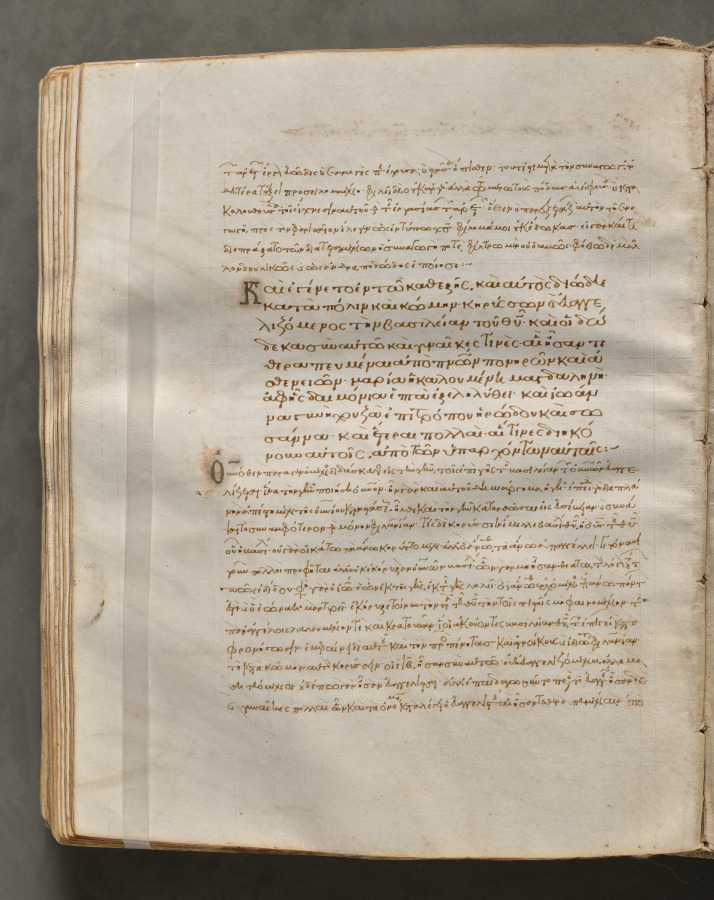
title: Text, folio 237 (verso), from a Gospel Book with Commentaries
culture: Byzantium, Constantinople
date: c. 1000–1100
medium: ink, tempera, and gold on vellum; leather binding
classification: Bound Volume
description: Each of the four gospels in this book opens on a page with brilliantly illuminated borders depicting the author of the text as well as birds—principally peacocks, symbols of the immortality of the soul—and fountains, representing the fountain of life and the salvation of the soul. This volume consists of 428 leaves with texts in Greek. Its level of sophistication suggests that it was probably written and decorated in a monastery in Constantinople.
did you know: Gospel books were carried in procession through Byzantine churches.